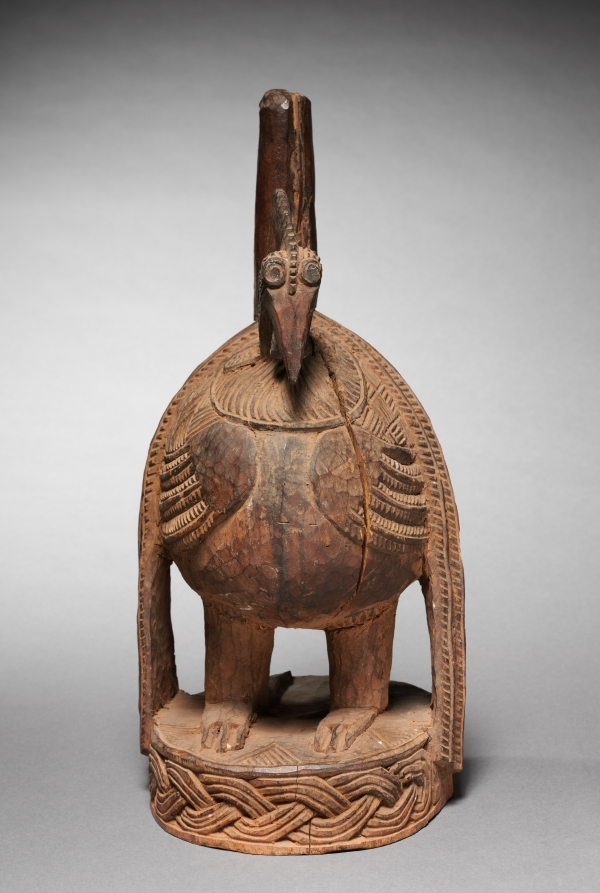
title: Hen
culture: Nigeria, Benin Kingdom, Ẹdo peoples, member(s) of the Igbesanmwan (wood and ivory carvers) guild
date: 1900s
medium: wood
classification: Sculpture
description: Materials used for ritual objects correspond with the status of their owner, or the person it was dedicated to. Men have cast brass roosters, while women have carved wooden hens like this. This egg-shaped bird is covered with patterns formed by parallel lines indicating the bird’s feathers, from fluffy tufts to sleek plumage. Realistically carved, it replicates an animal that would be sacrificed on a woman’s shrine. On an ancestral altar, it sat alongside other objects like rattle staffs. While Benin is patriarchal (men and their male sons lead), women are important; men cannot succeed spiritually or politically without them.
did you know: The interlacing pattern on the base of this sculpture can be seen in Benin Kingdom works in materials from wood to ivory to metal.